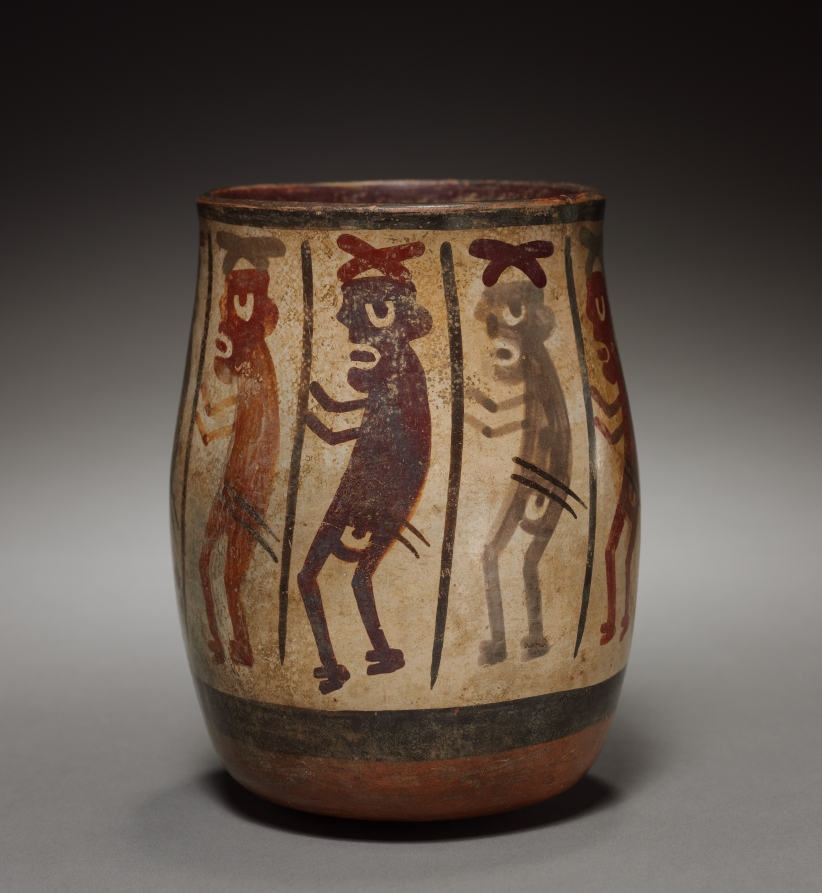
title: Vase with Procession of Warriors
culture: Peru, South Coast, Nasca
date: c. 350–600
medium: earthenware with colored slips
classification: Ceramic